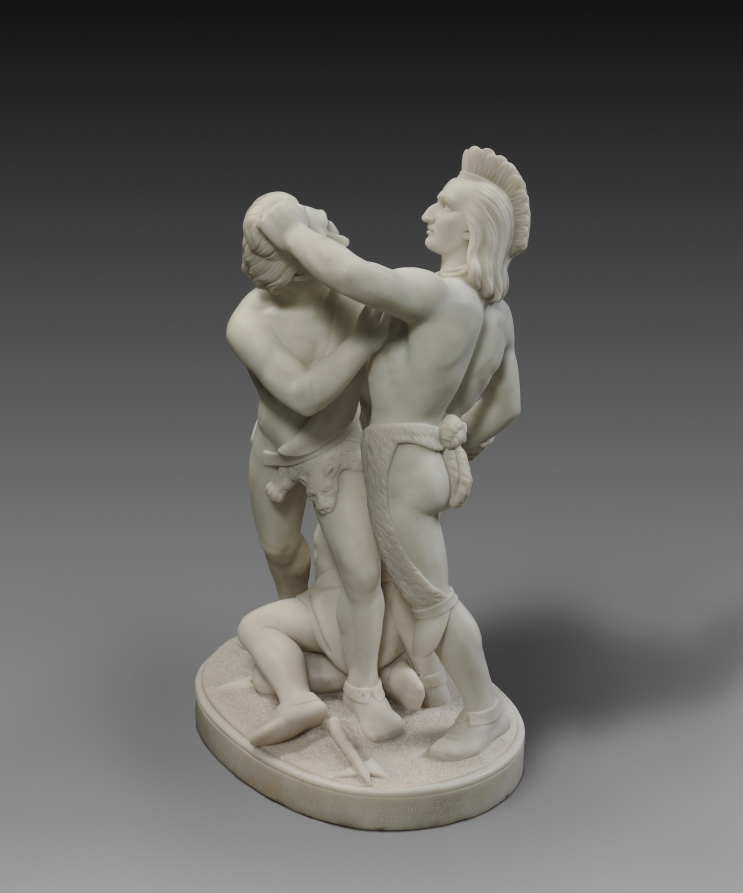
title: Indian Combat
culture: America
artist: Edmonia Lewis (American, c. 1844–1907)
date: 1868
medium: marble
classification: Sculpture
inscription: The base of the sculpture is inscribed: "EDMONIA LEWIS / FECIT A ROME 1868"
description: A spiraling composition with three intertwined figures, Indian Combat ranks as Edmonia Lewis’s most dynamic and complex creation. Although her Native American subjects typically exist in multiple versions, this example appears to be unique. Of Indigenous (Ojibwe) and African American ancestry, Edmonia Lewis studied at Oberlin College and apprenticed with a sculptor in Boston before moving to Rome in 1866. Her sculptures were readily purchased by patrons on both sides of the Atlantic.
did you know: Growing up in her Ojibwe community, Lewis went by a name that translates as "Wildfire."